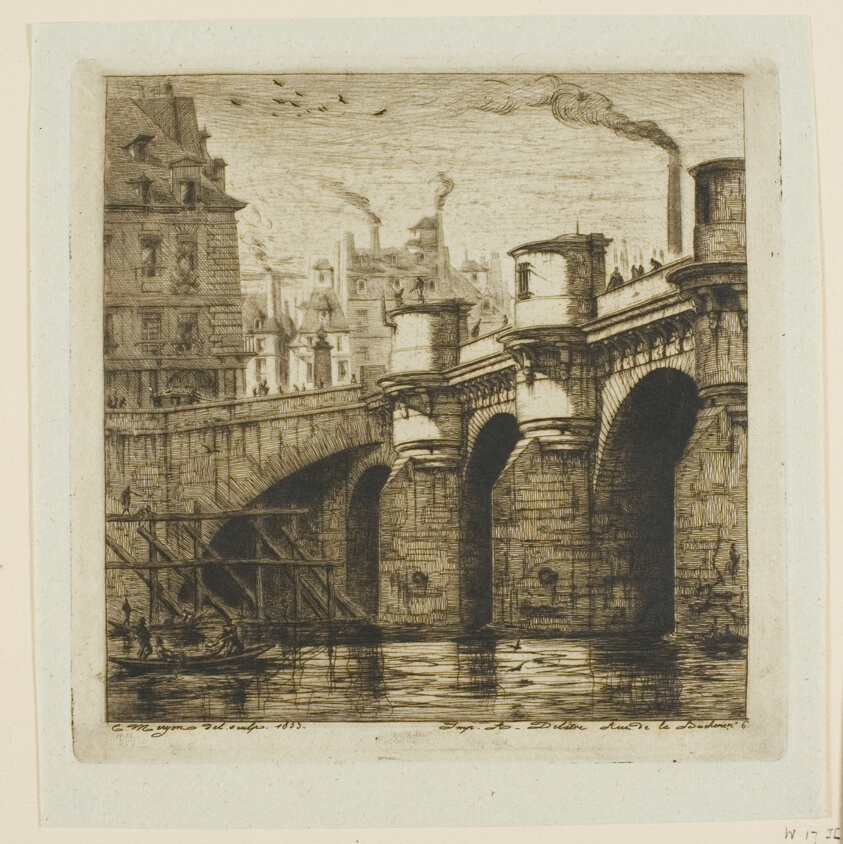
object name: Print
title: Pont-Neuf, Paris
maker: Charles Meryon (French, 1821-1868); printed by Auguste Delâtre (French, 1822-1907)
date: 1853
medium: Etching and drypoint in brown on verdâtre greenish laid paper, hinged to cream laid paper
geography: France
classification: etching; print; prints and drawing